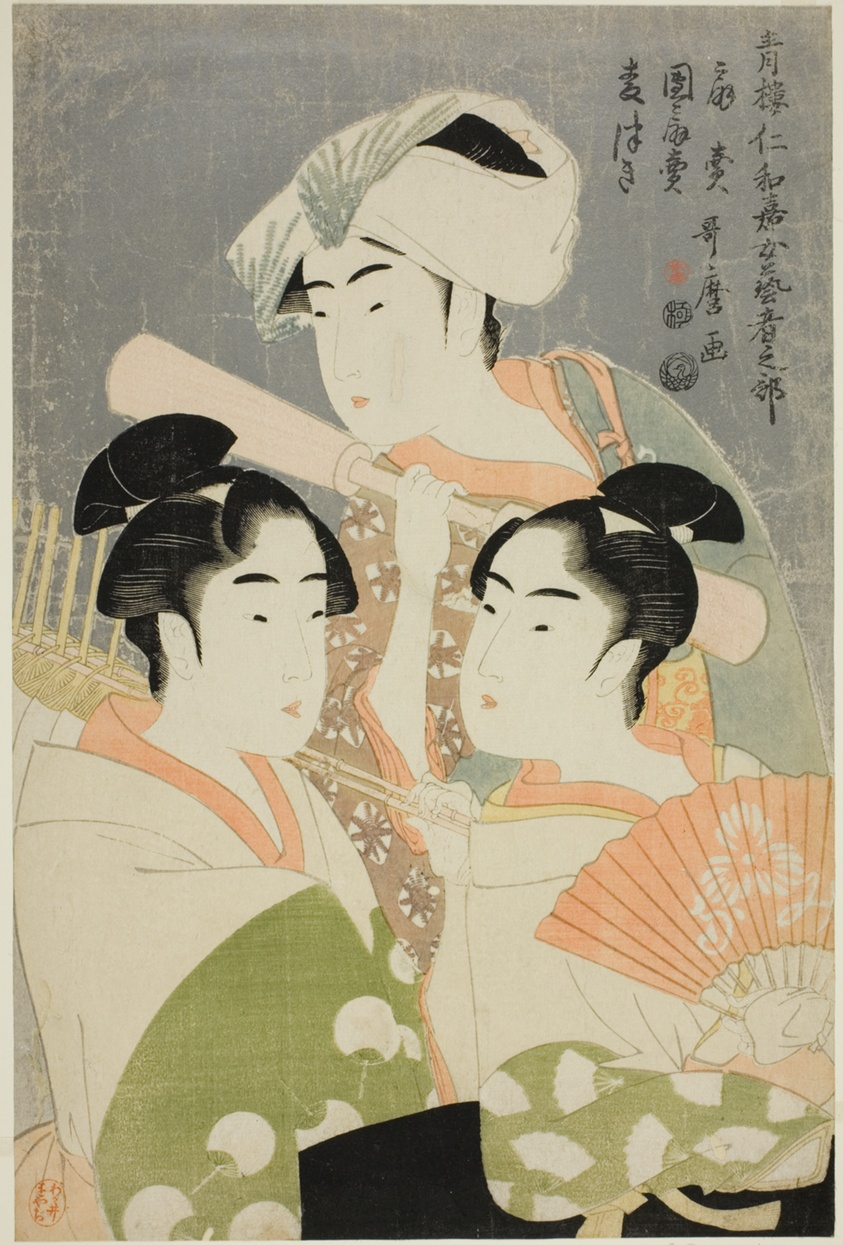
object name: Print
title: Folding Fan Seller, Round Fan Seller, and Barley Pounder (Ogi-uri, uchiwa-uri, mugi-tsuki), from the series "Female Geisha Section of the Yoshiwara Niwaka Festival (Seiro niwaka onna geisha no bu)"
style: Japanese (culture or style)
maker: Kitagawa Utamaro 喜多川 歌麿; Japanese, 1753 (?)-1806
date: 1793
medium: Color woodblock print; oban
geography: Japan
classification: woodblock print; print; asian art